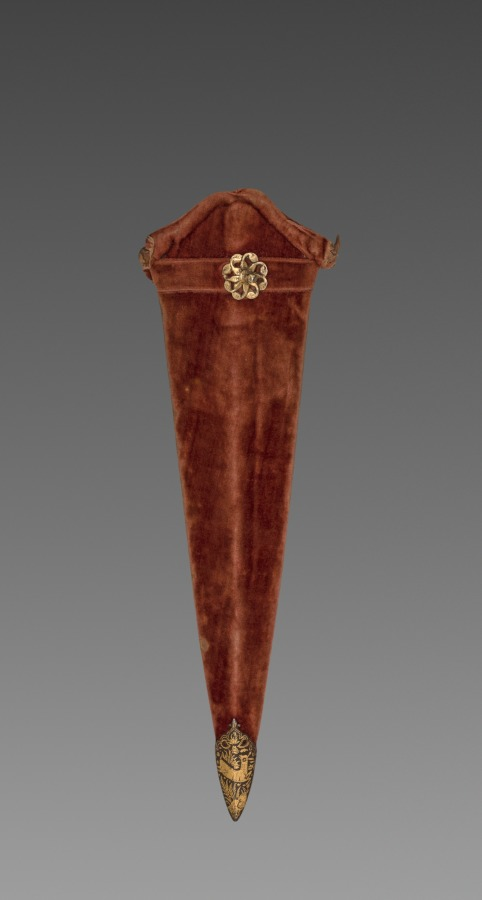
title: Katar (Stabbing Dagger): Sheath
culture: India, Mughal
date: 1700s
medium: wooden sheath with velvet cover, brass boss, iron tip with gold inlay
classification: Arms and Armor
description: Stabbing daggers called katar were distinctive to India and often worn by soldiers and courtiers, tucked into their belts. Covering the entire handle are tiny scenes of lions and cheetahs hunting deer and buffalo in rocky wooded settings.